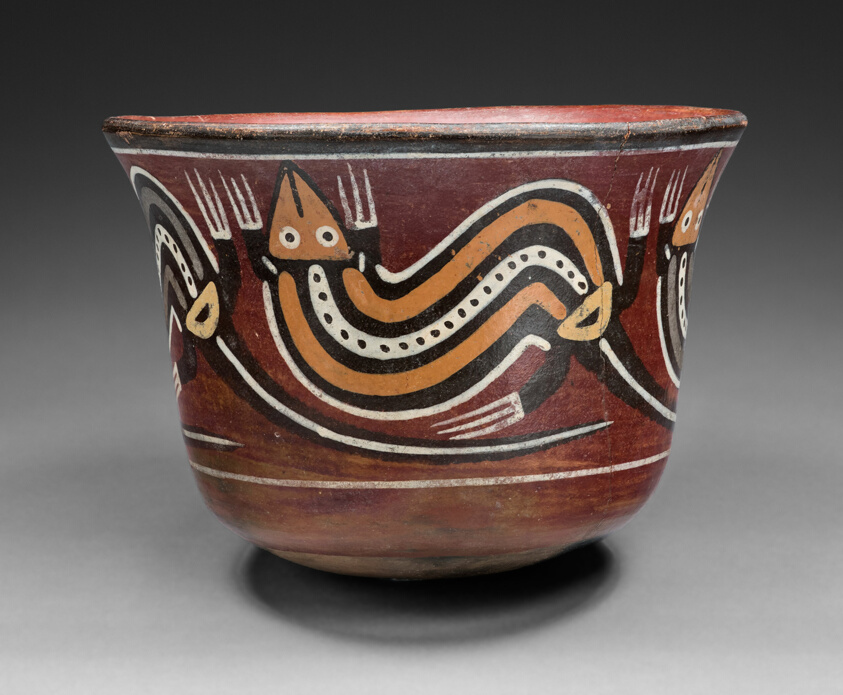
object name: Vessel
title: Cup Depicting Abstract Lizards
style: nazca, early intermediate period, Pre-Columbian, americas, Arts of the Americas, andean, andes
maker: Nazca; South coast, Peru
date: 180 BCE–500 CE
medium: Ceramic and pigment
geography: Nazca Valley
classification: earthenware; art of the americas; ceramics; vessel